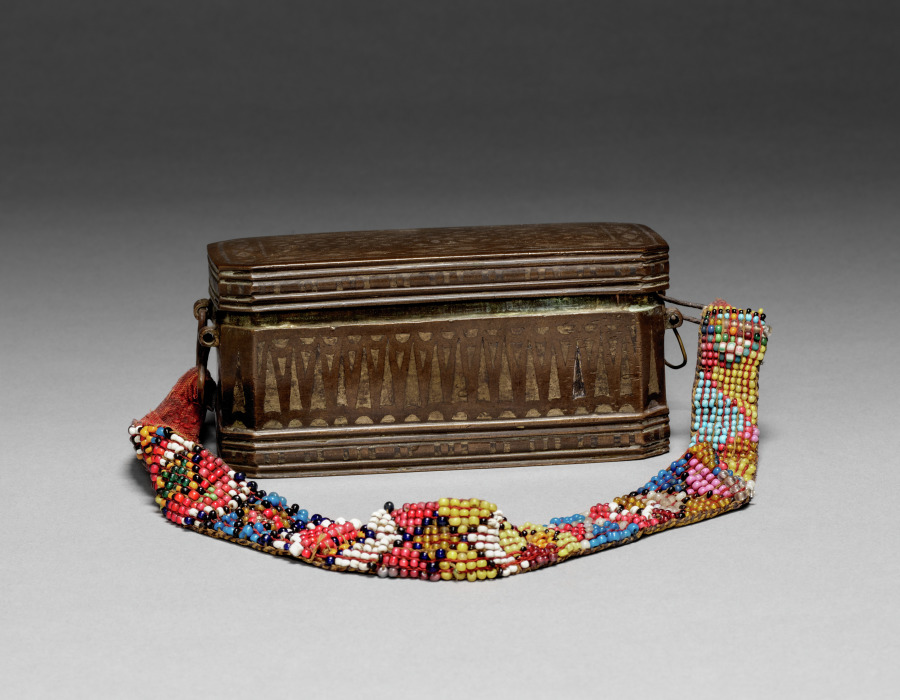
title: Betel nut container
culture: Philippines, Mindanao, most likely Maranao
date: 1800s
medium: Cast brass with silver inlays, weave fabric (handle), glass beads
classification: Arms and Armor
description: Chewing betel has been a social ritual common throughout Southeast Asia and Oceania for centuries. This betel nut container held the ingredients (areca nut, slaked lime, and betel leaves) used for this practice. The rectangular box, made of cast brass, is richly decorated with inlaid silver geometric motifs. It features a multicolored beaded strap with a pattern typical of the Bagobo people.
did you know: The beaded strap suggests portability; it may have been worn or suspended during social gatherings.